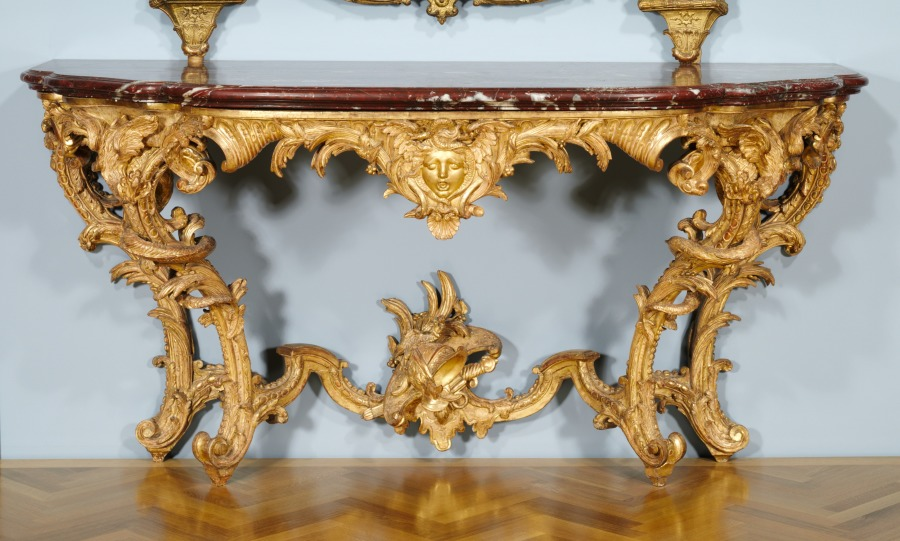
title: Console Table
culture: France, 18th century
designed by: Jules-Michel Hardouin (1635–1737)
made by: Michel II Lange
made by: Pierre Turpin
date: c. 1725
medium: carved gilt wood, marble top (griotte de campan)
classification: Furniture and woodwork